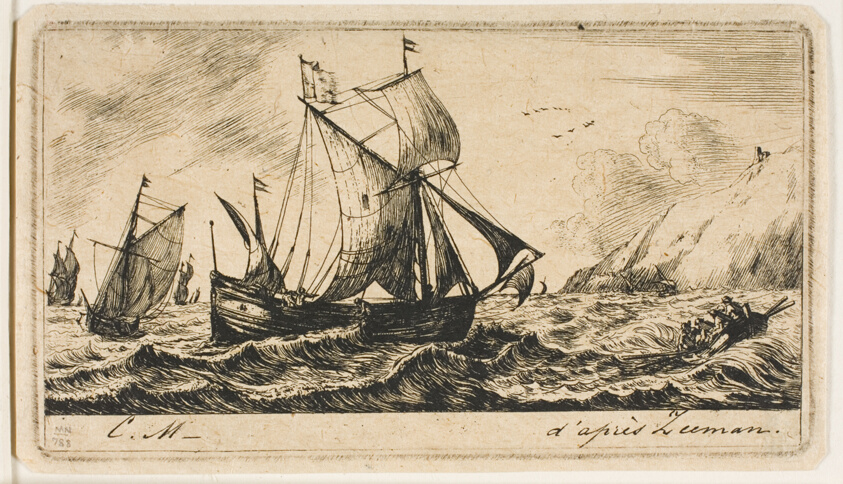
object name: Print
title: The Galliot of Jean de Vyl of Rotterdam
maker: Charles Meryon (French, 1821-1868); after Reinier Nooms (Dutch, c. 1623-c. 1664)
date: 1850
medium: Etching, engraving and roulette on tan wove paper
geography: France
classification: etching; print; prints and drawing